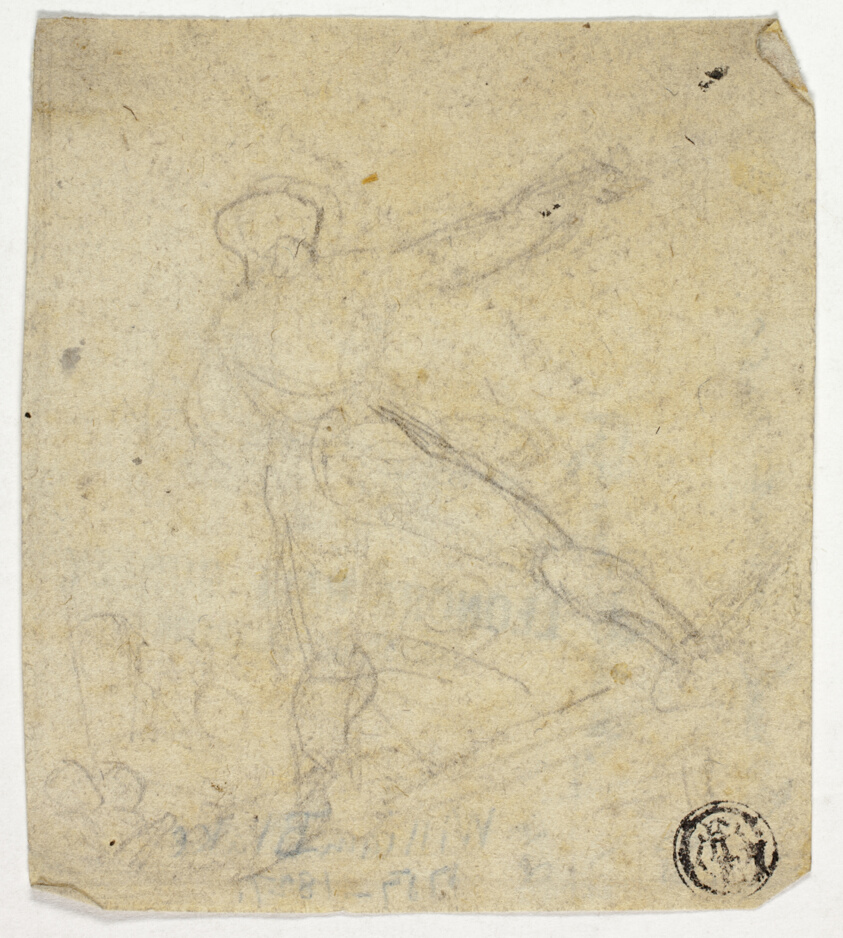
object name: Drawing and Watercolor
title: Figure Seen from the Back, with Outstretched Arm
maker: Attributed to William Blake (English, 1757-1827); or a follower of William Blake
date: c. 1800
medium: Graphite on cream laid paper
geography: England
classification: graphite; paper; drawings (visual works); prints and drawing